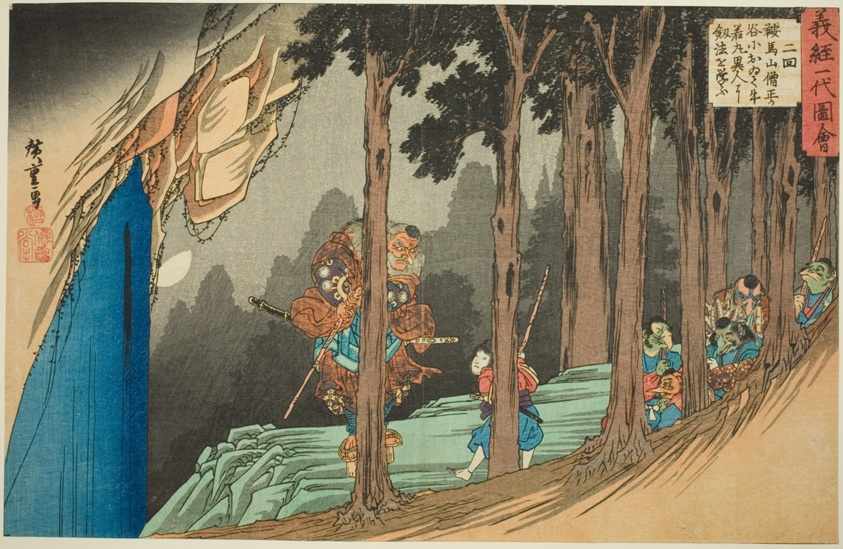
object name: Print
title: No. 2: Ushiwakamaru Learns Swordsplay from the Tengu at Sojogatani on Mount Kurama (Nikai, Kuramayama Sojogatani ni oite Ushiwakamaru ijin yori kenpo o manabu), from the series "The Life of Yoshitsune (Yoshitsune ichidai zue)"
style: Japanese (culture or style)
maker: Utagawa Hiroshige 歌川 広重; Japanese, 1797-1858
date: c. 1832/34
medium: Color woodblock print; oban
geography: Japan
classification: woodblock print; print; asian art